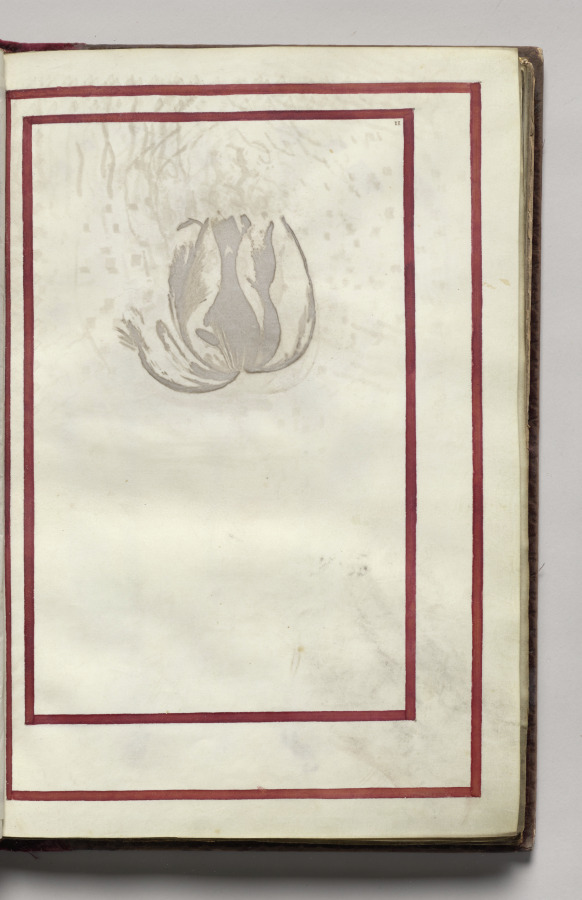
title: Border, folio 6 (recto), from Florilegium (A Book of Flower Studies)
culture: France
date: 1608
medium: watercolor, ink, silver and gold over occasional traces of pencil, on vellum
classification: Bound Volume